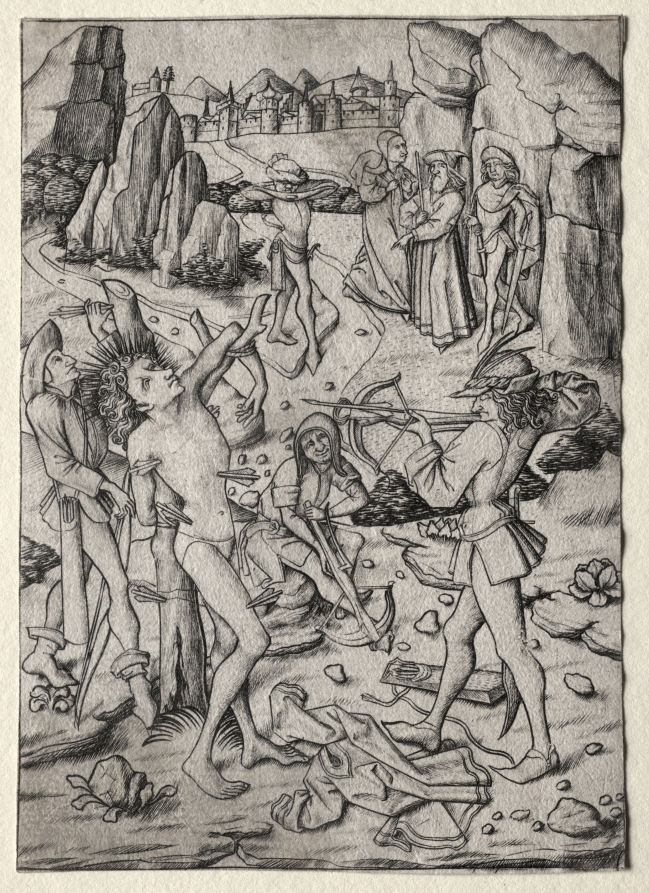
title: The Martyrdom of St. Sebastian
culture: Germany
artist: Master ES (German, active 1450–67)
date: 1450–67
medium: engraving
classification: Print